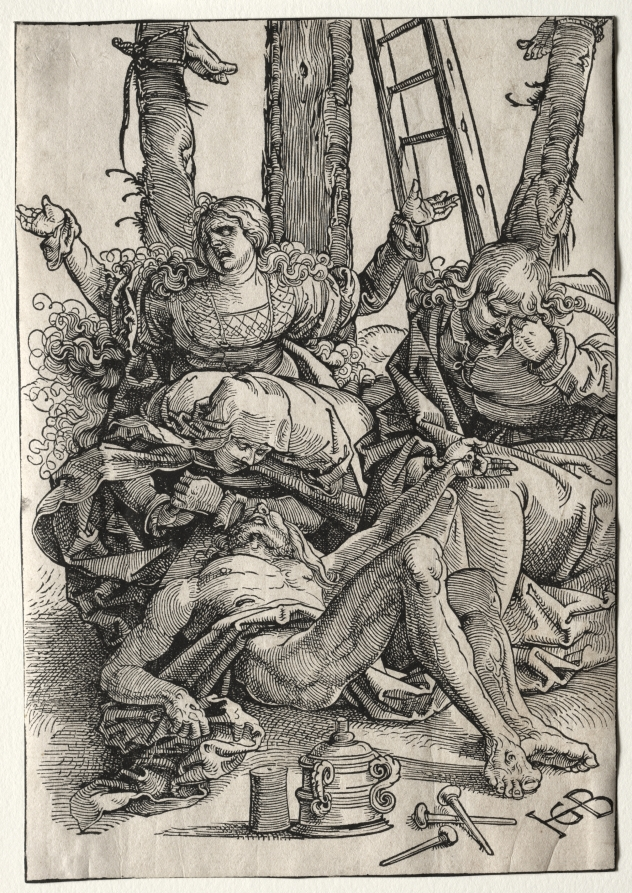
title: Lamentation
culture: Germany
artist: Hans Baldung (German, 1484/85–1545)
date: c. 1515–17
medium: woodcut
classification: Print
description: Baldung's originality is evident in Lamentation, one of his most expressive and deeply moving works. Every element—radical foreshortening, compressed figures in exaggerated poses, the abruptly truncated top of the composition, even the frenzy of Mary Magdalene's cascading curls—intensifies the expression of grief. The low point of view projects instruments of the Passion into the spectator's space, making one a participant in this anguished drama.